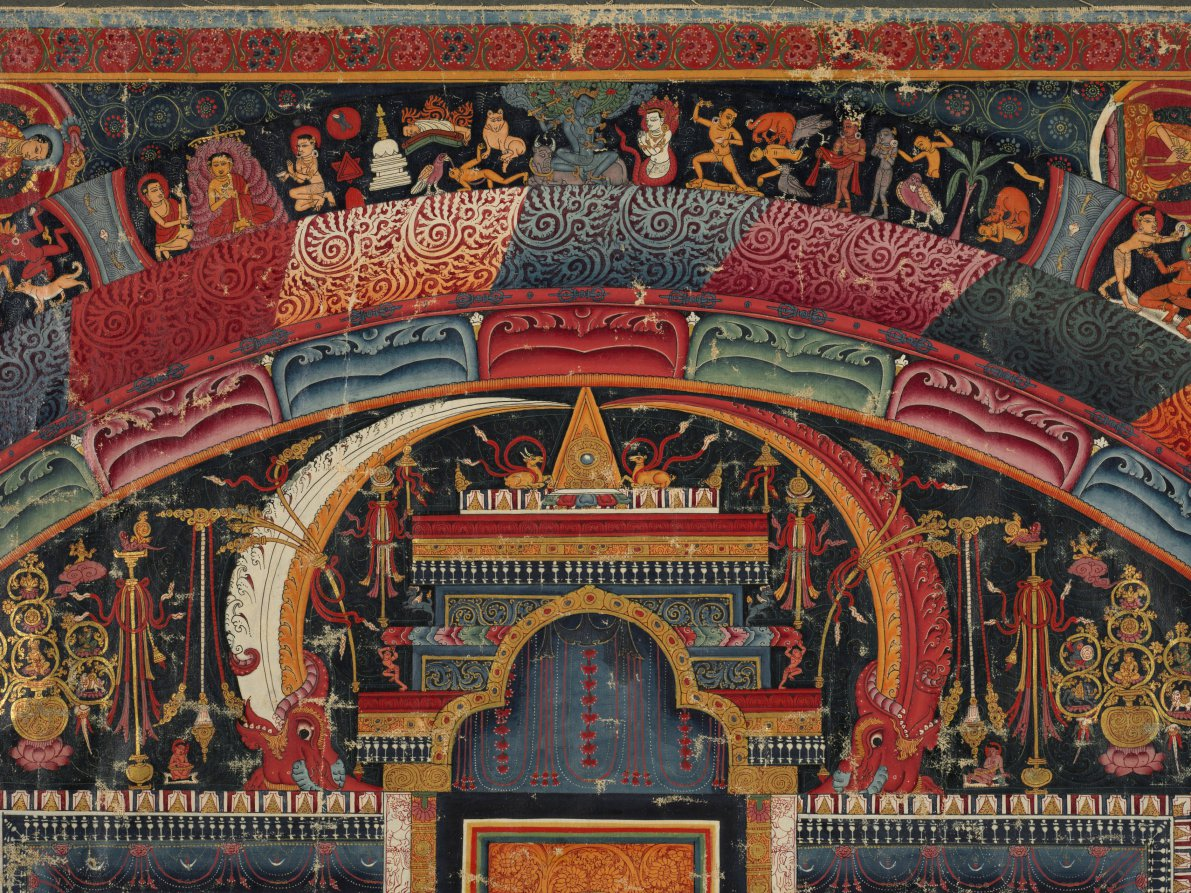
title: Twenty-three Deity Nairatma Mandala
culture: Central Tibet, Sakya-affiliated monastery, 14th century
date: c. 1375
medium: Gum tempera, ink, and gold on cloth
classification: Painting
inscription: The inscription along the bottom says: Twenty-three deity Nairatma Mandala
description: One of the main types of imagery in tantric Buddhist art is the mandala, a two-dimensional diagram of the realm of an enlightened being. This mandala depicts the palace of Nairatma, who dances in the center surrounded by her entourage. Using the painting as a guide, the tantric practitioner in meditation mentally projects the two-dimensional plan into three-dimensional space and enters into it. The outermost ring contains depictions of the cremation grounds, where corpses are being burned and consumed, as well as tantric yogis and masters who work there in order to understand the impermanence of the body, defeat their fear of death, and overcome irrational aversions to impure aspects of life. Virupa is depicted twice, always pointing to arrest the sun with his raised left hand. He sits among the row of lineage masters along the top edge, and is also depicted in the topmost segment of the ring of cremation grounds, being served a cup of liquor. Along with lineage masters at the top of this impressive painting, bodhisattvas and important masters are depicted in the spandrels, each identified by an inscription.